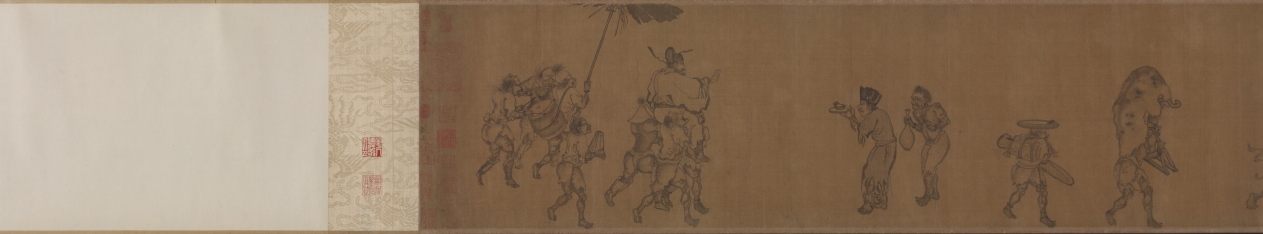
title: The Lantern Night Excursion of Zhong Kui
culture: China, Yuan dynasty (1271-1368)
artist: Yan Hui (Chinese, active 1270–1310)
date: late 1200s–early 1300s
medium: handscroll; ink and slight color on silk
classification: Painting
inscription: Artist's signature [and probable seal]: Yan Qiuyue 顏秋月 Title on frontispiece and 1 seal of Niu Shuyu 鈕樹玉 (1760–1827): Qiuyue mohuan 秋月墨幻 [Qiuyue's Ink Fantasy]. 31 additional seals: 2 of Yang Shiqi 楊士奇 (1365–1444); 2 of An Guo 安國 (1481–1534); 8 of Xiang Yuanbian 項元汴 (1525–1590); 2 of Geng Zhaozhong 耿昭忠 (1640–1686); 4 of Pu Tung 溥侗 (1870–1952); 7 of Tan Jing 譚敬 (1911–1991); 1 of Liu Ting-chih (20th c.); 5 unidentified.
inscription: An inscription by Zizhi Shanren 紫芝山人 [probably Jiang Hui 蔣惠], dated 1389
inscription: An inscription by Wu Kuan 吳寬 (1436–1504)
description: Here, the demon queller Zhong Kui leads a nightly procession of street entertainers with bare, muscular bodies and demonic faces. Some wear shabby clothes, and all perform stunts and tricks to astound and scare the viewer. In fact, a New Year custom in cities of southeast China had the poor, disguised as demons, process through the streets and play their tricks to clear households of evil spirits and welcome the spring. From right to left, a demonic figure leads the procession and beats a drum; another lifts a large rock; one stands on his hands trying to drink; one balances a jar on his elbow; three hold and wield weapons; one carries a folded chair covered by a cow’s skin; another holds Zhong Kui’s qin (zither), books, brush, and inkstone. At the end of the scroll, two figures offer a cup and bottle of wine to Zhong Kui, who lifts his hand in command.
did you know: Zhong Kui was an ancient ghostbuster.